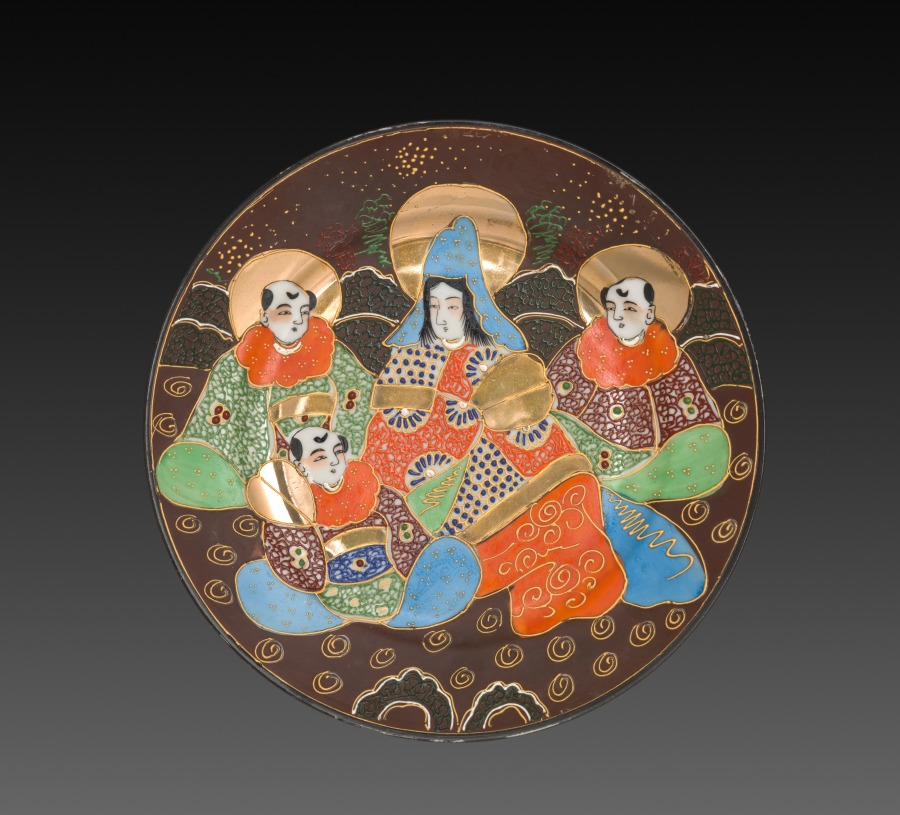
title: Plate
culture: Japan, Meiji period (1868–1912)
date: early 1900s?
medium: enamelled porcelain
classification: Ceramic